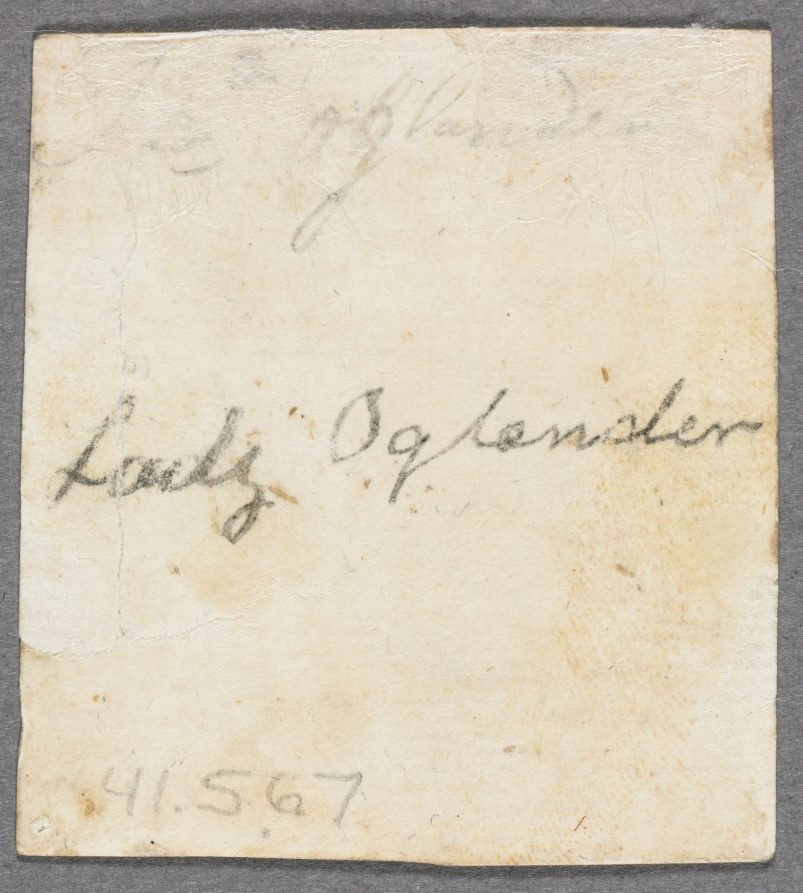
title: Portrait of Sukey, Lady Oglander, née Serle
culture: England, 18th century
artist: John I Smart (British, 1741–1811)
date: c. 1770s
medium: graphite and wash on laid paper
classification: Portrait Miniature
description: Although it is impossible to say if it was always part of the artist’s process to execute a preparatory sketch prior to painting each miniature, we do know that John Smart retained many hundreds of these sketches. A group of preparatory sketches—of which this portrait is one—descended through the Smirke family after Smart’s daughter Sarah gave a sketchbook containing preparatory portrait studies to her friend Mary Smirke, sister of the celebrated Victorian architect Sydney Smirke. This book was probably broken up around 1877 when it was divided between Sydney’s daughters Mary Jemmett and Mrs. Lange, whose portions were both sold at auction in 1928. G. C. Williamson was the first to suggest that Smart’s sketches were well known and that they were preparatory studies for the painted miniatures. Williamson listed the names of sitters from the sketches known to him at the time, and they include Lady Oglander. This portrait was assigned the historically colorful but fictitious title of “Duchess of Bourbon” at some point after memory of its true identity had been lost. Giving illustrious titles to portraits of unknown sitters was a popular strategy adopted by dealers during the nineteenth and twentieth centuries, often applied to miniature portraits and, in particular, to Smart’s sketches of women. However, when the paper backing was removed from this miniature, the name Lady Oglander was discovered written twice in graphite on the back. The lower inscription seems to have been reinforced or written later and is probably not in the artist’s hand. Compared to his contemporaries George Engleheart (1752–1829) and Andrew Plimer (1763–1837), whose female sitters were often painted in similar simple white gowns, Smart often lavished more attention on the costumes in his portraits of women, whose dresses incorporated colored silks, printed fabrics, and luxury trimmings like lace and fur, as seen here. The sitter’s head and shoulders face right, and her light hair is dressed high, with flat curls at the back of her head. She has gray eyes and wears a lavender surcoat trimmed with ermine, over a turquoise blue, low-necked dress and white underslip bordered with lace; the ermine trim confirms that the sitter was a titled lady. Smart placed her inside a faintly suggested oval, and the background is unpainted. Sukey, Lady Oglander (née Serle, d. 1805), married Sir William Oglander, 5th Baronet of Nunwell (1733–1806), in 1765. She was the only daughter of Peter Serle of Testwood, Hants, and delighted the Oglander family by bringing £10,000 to the marriage. Sukey had eleven children with William, eight of whom survived childhood. The Oglanders were a prominent and well-loved family on the Isle of Wight, their presence on the island first dating from the time of William the Conqueror and lasting until the title expired in 1874 when the last Oglander Baronet of Nunwell died. This preparatory sketch somewhat resembles a miniature on ivory of the same size that sold at Christie’s, London, in 2000. The sitter’s name is unknown, but she wears a nearly identical green wrap gown and underslip and a lavender surcoat, though it is trimmed with brown fur rather than ermine. Her coiffure is similar to that in the preparatory sketch as well, though in the ivory her hair is ornamented with pearls. The facial features, however, differ, with the sketch representing an older woman having somewhat coarser features. While the portrait may have been idealized in the finished ivory version, it is also possible that the sketch was employed primarily for the costume and depicts another sitter entirely. Daphne Foskett lists among Smart’s work portraits of a Dr. John Oglander and a Lady and Miss Oglander. A preparatory sketch by Smart of a Mr. Oglander sold at Christie’s, London, on June 10, 2010. Another preparatory sketch titled Portrait of John Oglander, Warden of New College, Oxford, was sold at Bonhams, London, on October 30, 2001. These sketches are approximately the same size as Cleveland’s Lady Oglander and may have been commissions related by date or patron. The sale of Smart drawings inherited by W. H. Bose and sold at Christie’s, London, in 1937 included a “Head of Miss Oglander,” “sister to Sir John Oglander of the Isle of Wight,” but this lot was not illustrated, and its relationship to the sketch discussed here is unknown. John Oglander, Warden of New College, Oxford, was the brother-in-law of Sukey, Lady Oglander, and Miss Oglander was probably her sister-in-law Susannah Oglander (d. 1816).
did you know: Sketches helped John Smart work out the particulars of a portrait before commencing the miniature on ivory, and they were useful in the event that a duplicate might later be required.